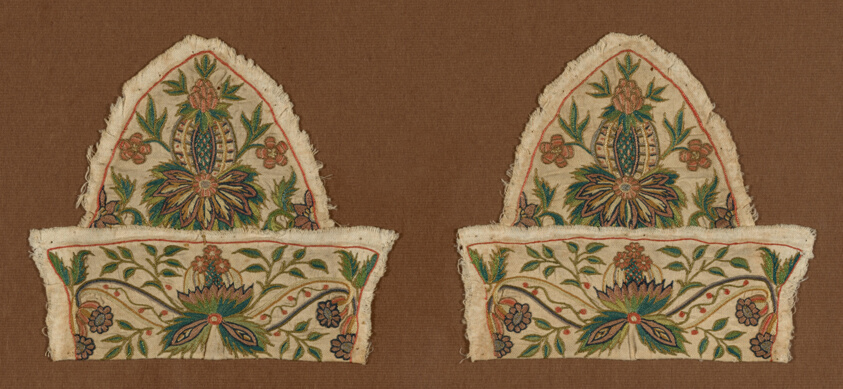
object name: Costume and Accessories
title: Cap (Disassembled)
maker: England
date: 18th century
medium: Wool, twill weave; embroidered in chain stitch and French knots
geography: England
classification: textile; costume accessory - headdress; needlework (visual works); costume accessory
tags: fashion, floral motifs